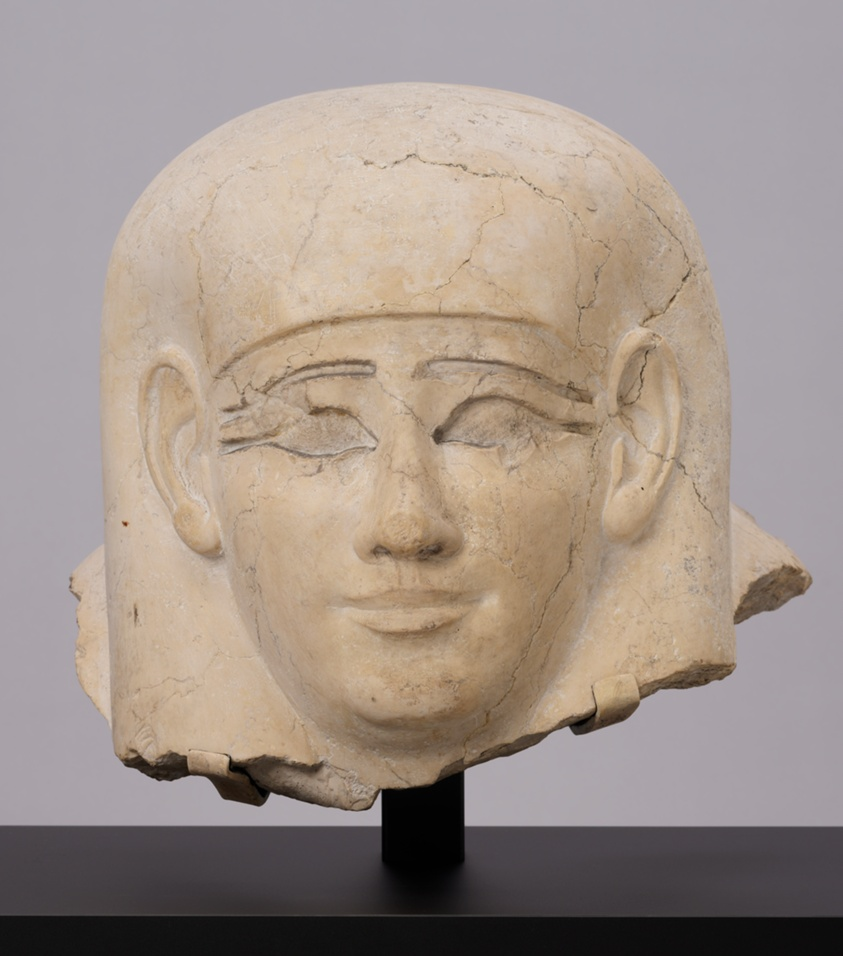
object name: Funerary Object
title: Head From an Anthropoid Sarcophagus Lid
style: ptolemaic, greco-roman (egyptian)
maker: Egyptian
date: Ptolemaic Period (332 BCE–30 BCE)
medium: Limestone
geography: Egypt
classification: sculpture; ancient art